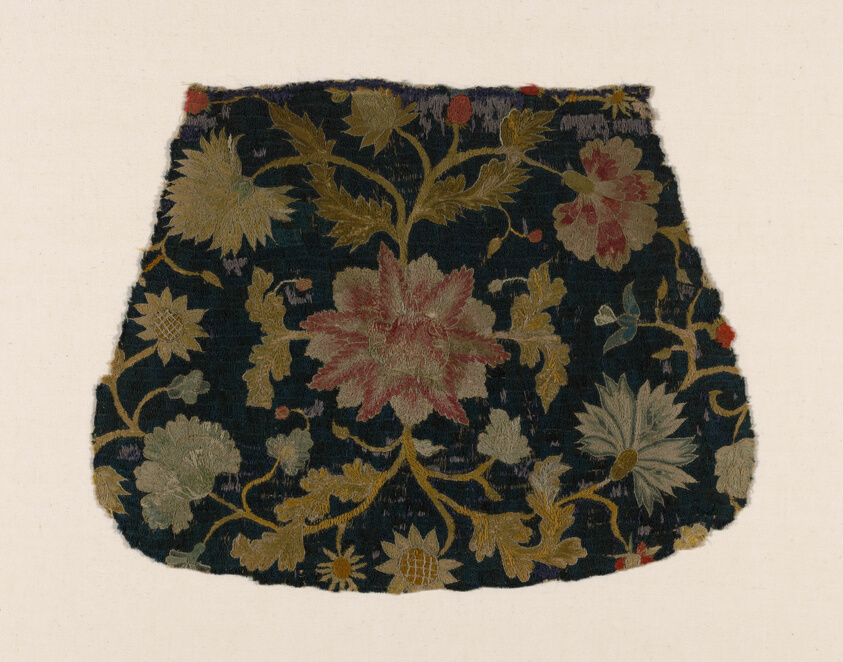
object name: Textile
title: Chair Seat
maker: Abigail Davenport Williams (American, 1696–1766); Probably Stamford, Connecticut, United States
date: c. 1717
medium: Linen, plain weave; embroidered with wool yarns in bullion, flat, Roman, satin, stem, and surface satin stitches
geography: Stamford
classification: textile; needlework (visual works)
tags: flowers, flora, floral motifs